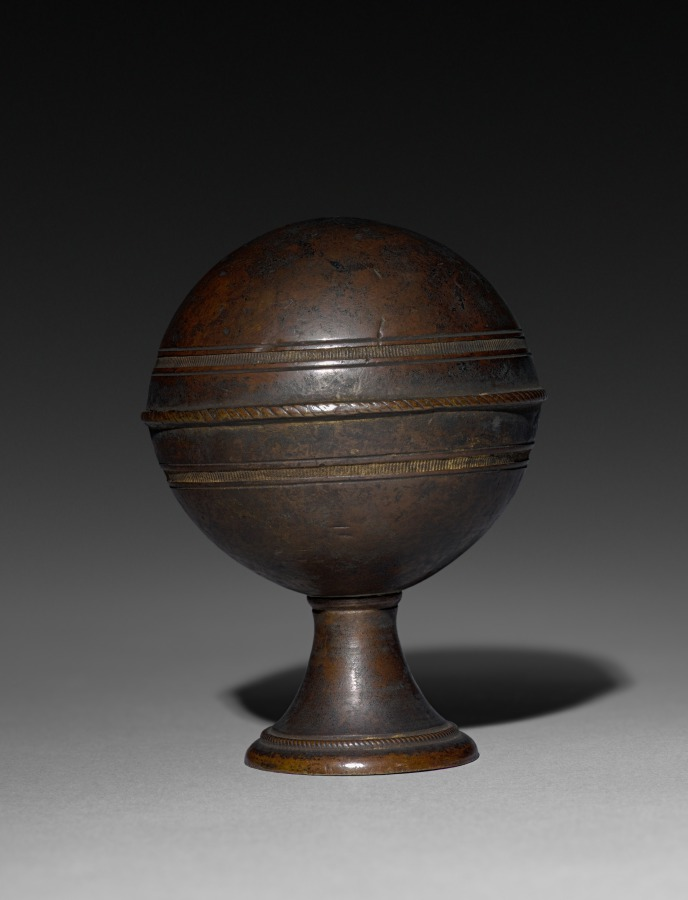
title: Ornamental Finial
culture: France, early 19th century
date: early 1800s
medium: bronze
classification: Metalwork